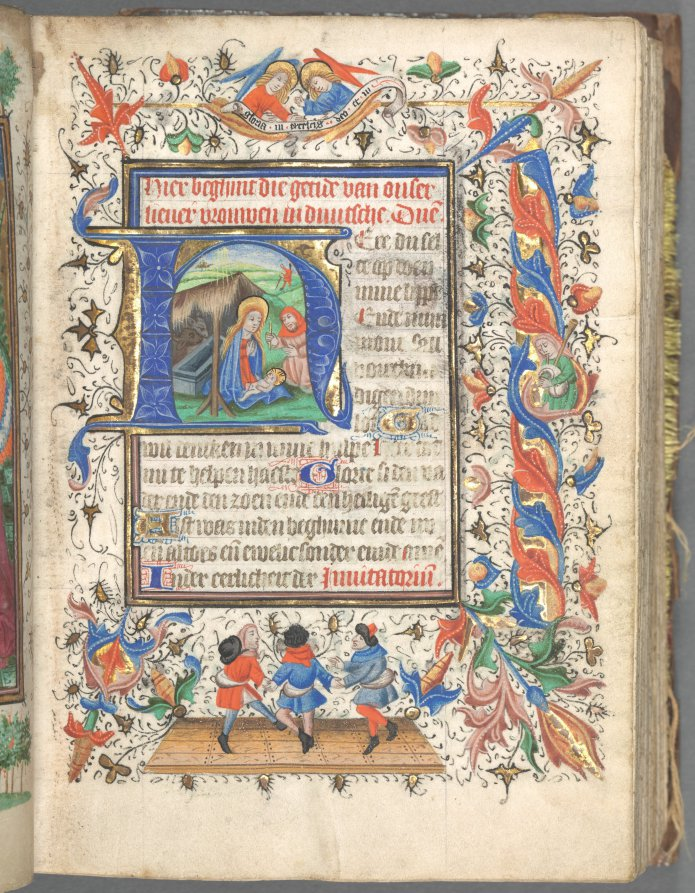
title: Book of Hours (Use of Utrecht): fol. 14r, Initial with The Nativity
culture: Netherlands, Utrecht, 15th century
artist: Master of Gijsbrecht van Brederode (Netherlandish)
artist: Master of the Boston City of God (Netherlandish)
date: c. 1460–1465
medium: ink, tempera, and gold on vellum; binding: brown Morocco over original wooden boards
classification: Bound Volume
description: This manuscript is a collaborative effort of two talented illuminators with distinctive styles. Ninety-seven historiated initials (letters containing scenes), including the one on recto (right side) shown here, are by the Master of the Boston City of God, a painter who worked in Utrecht. Four full-page miniatures (small paintings), including the Nativity on the verso (left side), have recently been attributed to the Master of Gijsbrecht van Brederode. The background of the Nativity depicts a distant cityscape (perhaps Utrecht), adjacent to which may be seen the Journey of the Magi and the Annunciation to the Shepherds. In the left margin, the Virgin Mary (above) appears to the Roman Emperor Augustus and the Tiburtine Sibyl, who, according to legend, foretold the coming of Christ. This volume is not written in Latin, but in a Dutch littera textualis, an elegant Gothic bookhand.